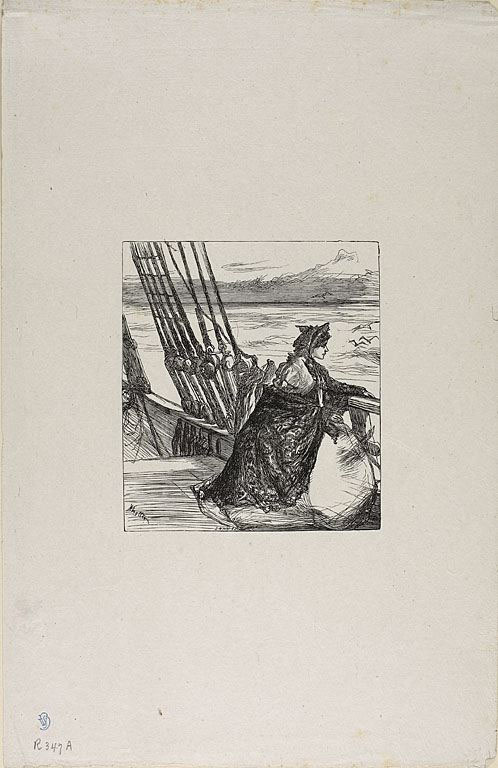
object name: Print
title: The Major's Daughter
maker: Joseph Swain (English, 1820-1909); after James McNeill Whistler (American, 1834-1903)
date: 1862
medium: Wood engraving in black ink on light gray China paper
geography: United States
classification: wood engraving; print; prints and drawing